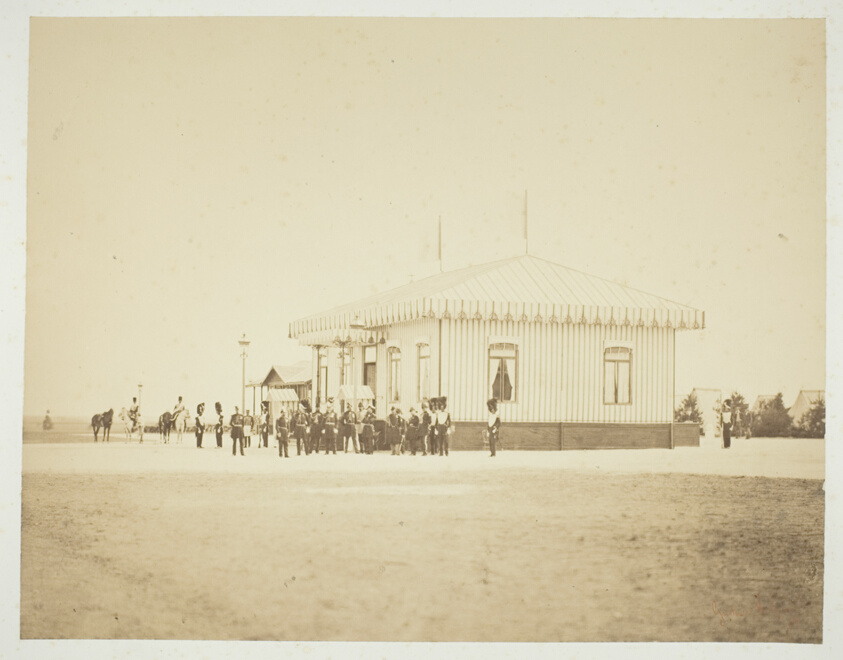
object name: Photograph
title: Untitled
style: 19th century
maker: Gustave Le Gray (French, 1820–1884)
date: 1857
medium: Albumen print, from the album "Souvenirs du Camp de Châlons"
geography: France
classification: albumen silver print; photographic process; photography; photograph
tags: Paris